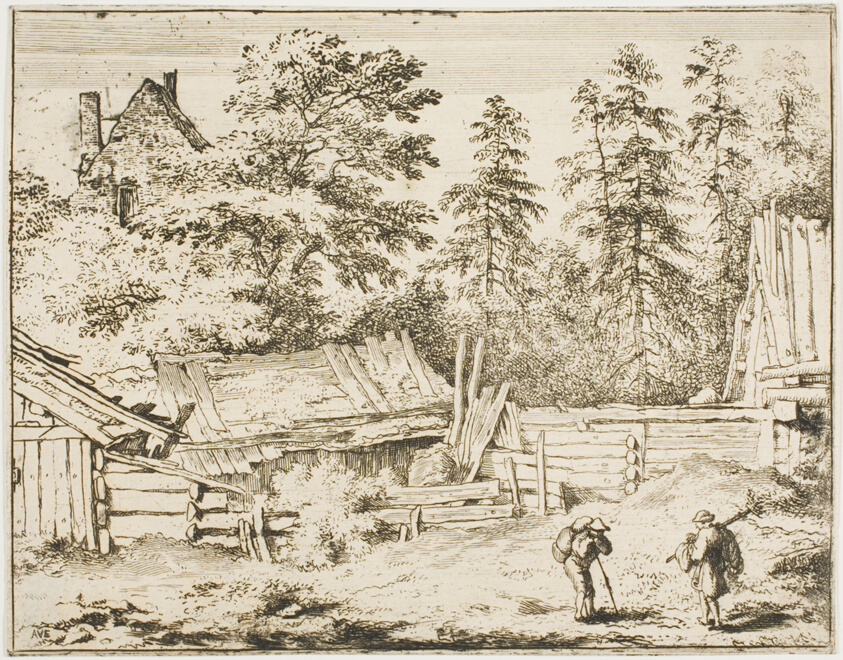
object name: Print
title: Farm Sheds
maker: Allart van Everdingen; Dutch, 1621-1675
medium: Etching in black on ivory laid paper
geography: Holland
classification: etching; print; prints and drawing